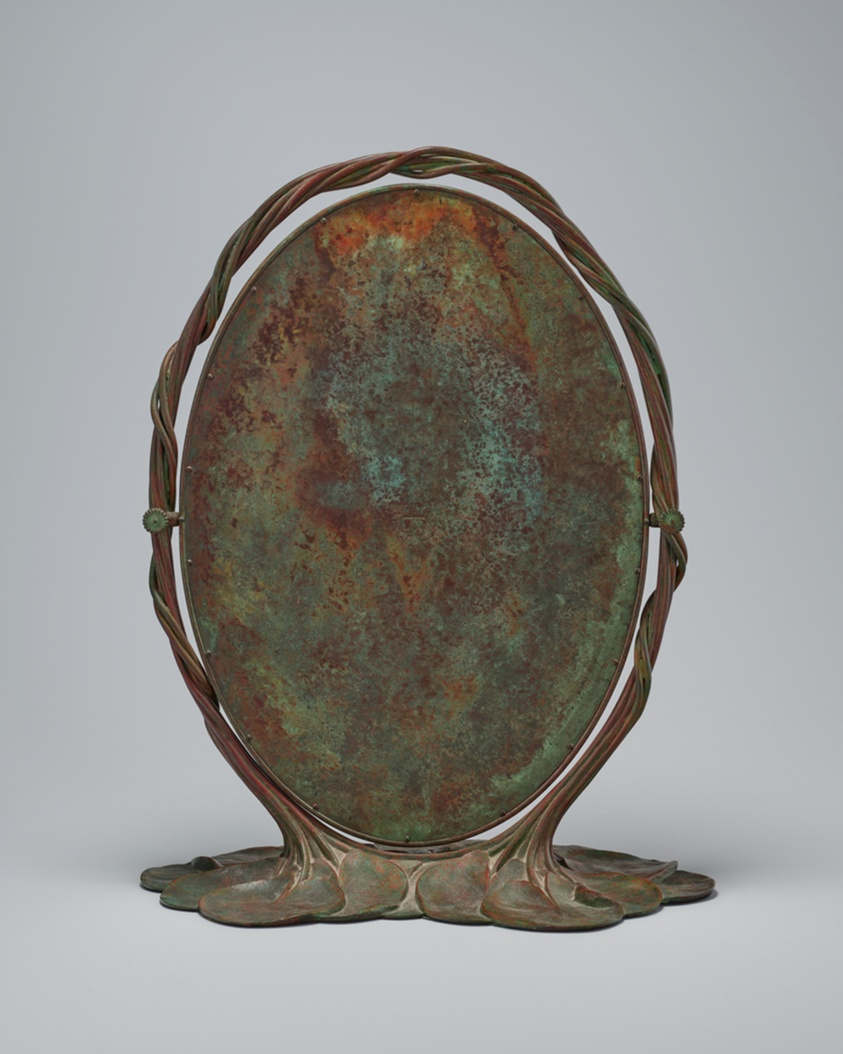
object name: Furnishings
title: “Pond Lily” Mirror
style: Arts and Crafts Movement, 20th Century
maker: Tiffany Studios (American, 1902–32); Corona, New York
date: c. 1905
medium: Bronze and mirrored glass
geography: Corona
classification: dresser mirror; american decorative arts; decorative arts; flat mirrors; mirror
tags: Nymphaea, pond lily, pond, water lilies